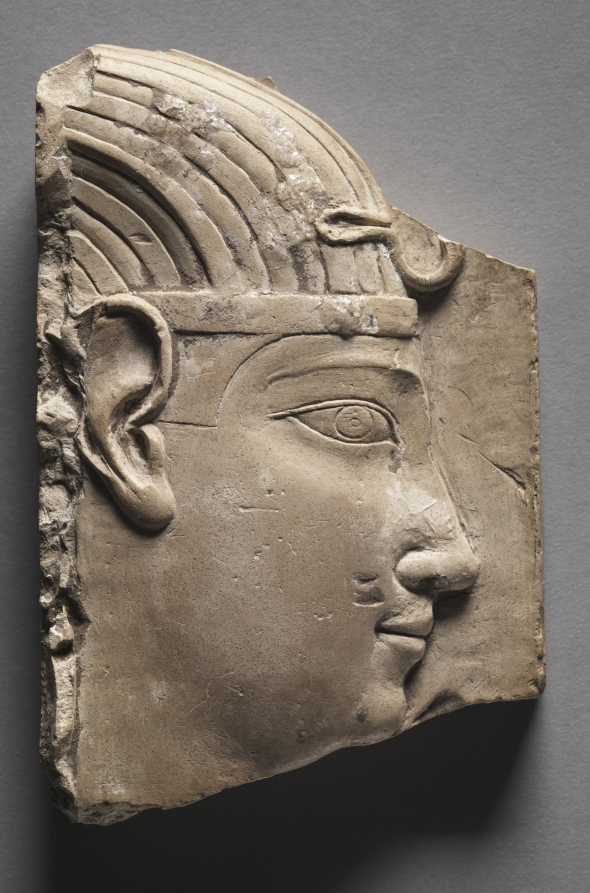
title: Votive Relief of a King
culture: Egypt, Greco-Roman period (332 BCE–395 CE), Ptolemaic dynasty (305–30 BCE)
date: 305–246 BCE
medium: limestone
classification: Sculpture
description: Trial pieces—carved on limestone flakes, or ostraca—and sculptors' models allow us to see how the ancient Egyptian artist approached his work. Showing the profile of a king in relief, this piece is a masterpiece in its own right, and was probably meant to be copied.